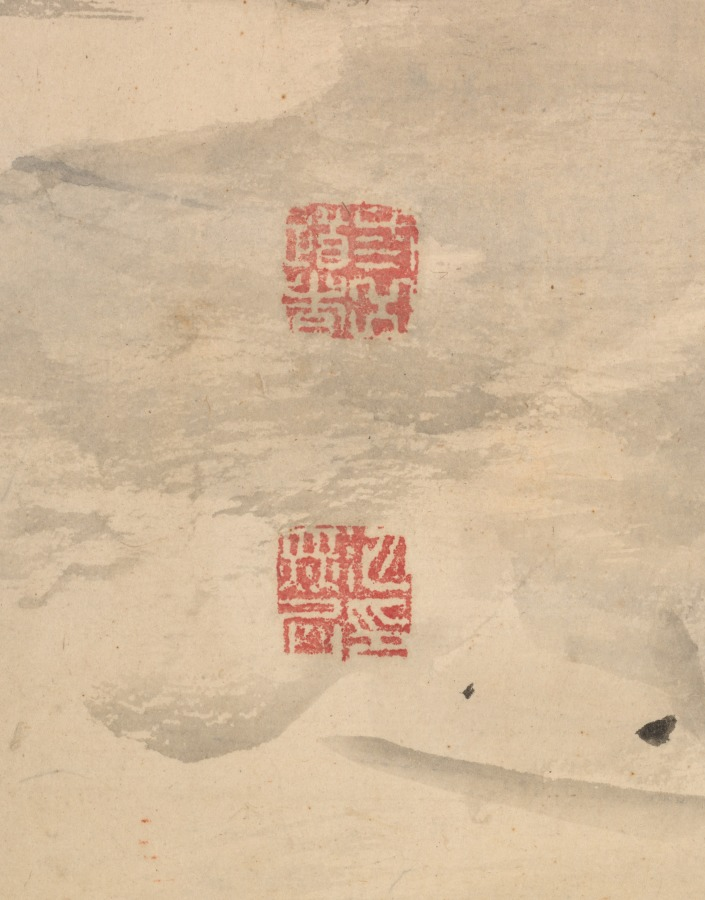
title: Bamboo and Rocks in Clearing Skies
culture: Japan, Edo period (1615–1868)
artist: Ike Taiga (Japanese, 1723–1776)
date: mid-1700s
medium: Two-panel folding screen; ink on paper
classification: Painting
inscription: signed, titled, and sealed by the artist on the top of the left panel. Set of two seals appears once on each panel: after the signature on the left panel and lower left on the right panel. The first of the two square seals reads "ike no mumei," the second reads "sangaku doja."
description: The title written on this screen corresponds to one on a design in Taiga’s Brush Methods (大雅堂画法). The concept conveyed is one of scenery and spirit refreshed by precipitation. In the screen, a rain-filled stream rushes from the mountains into a river. A village is nestled amid giant bamboo in the distance. A platform-like flat rock in the foreground invites us to step into the scene.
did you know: Ike Taiga ranks among the most creative painters of the Edo period: he produced over 1,000 compositions in various formats.